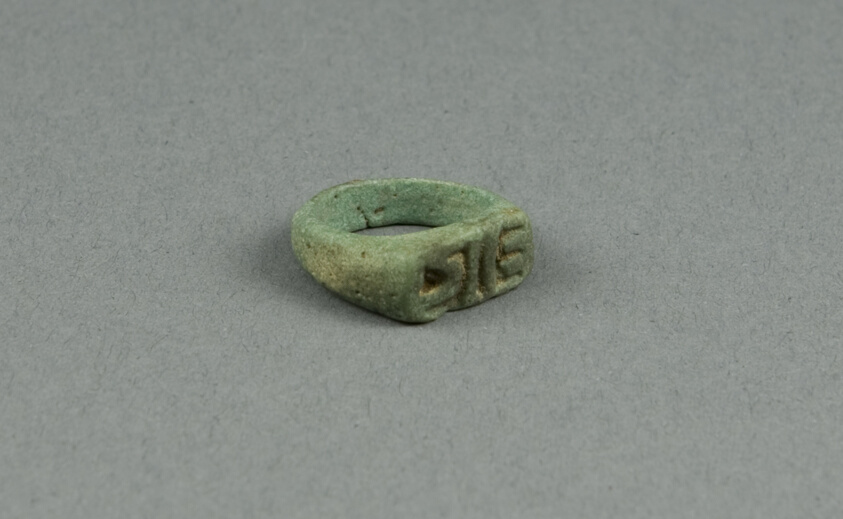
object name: Costume and Accessories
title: Ring with Hieroglyphs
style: egyptian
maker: Egyptian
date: New Kingdom–Third Intermediate Period?, Dynasty 18–25 (about 1550–656 BCE)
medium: Faience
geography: Egypt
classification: ceramics; jewelry; ancient art; costume; faïence (composite material)